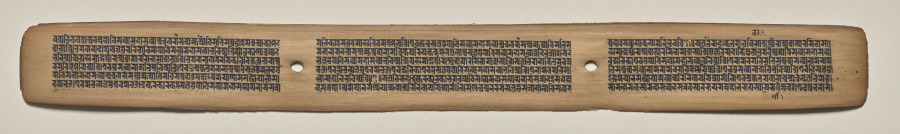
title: Text, Folio 106 (recto), from a Manuscript of the Perfection of Wisdom in Eight Thousand Lines (Ashtasahasrika Prajnaparamita-sutra)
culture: Eastern India, Bihar, Vikramashila Monastery. Painting: Nepal, Kathmandu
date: Sunday, September 14, 1119 (year 239 of the Newar Samvat in the month of Ashvina)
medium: gum tempera and ink on palm leaves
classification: Painting